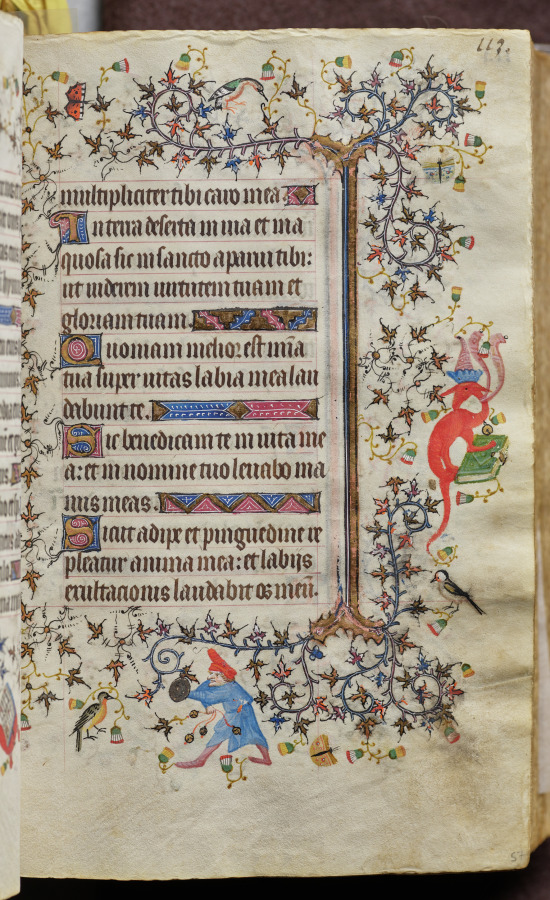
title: Hours of Charles the Noble, King of Navarre (1361-1425): fol. 57r, Text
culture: France, Paris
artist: Master of the Brussels Initials and Associates (French)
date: c. 1405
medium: ink, tempera, and gold on vellum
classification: Bound Volume